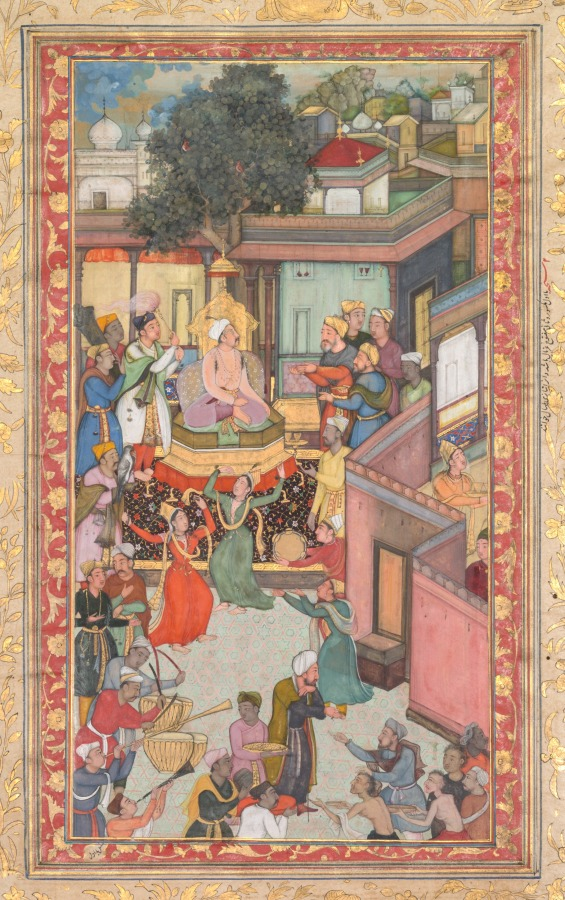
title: Circumcision ceremony for Akbar’s sons, painting 126 from an Akbar-nama (Book of Akbar) of Abu’l Fazl (Indian, 1551–1602)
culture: Mughal India, court of Akbar (reigned 1556–1605)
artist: attributed to Dharam Das (Indian, active c. 1580–1605)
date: c. 1602–3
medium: gum tempera, ink, and gold on paper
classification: Painting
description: This page is from a copy of the biography of Akbar that was completed not long before his death in 1605. It depicts him much younger, during the festivities held on October 22, 1573, in his newly built capital city of Fatehpur Sikri, near Agra, on the occasion of the circumcision ceremony for his three young sons. Dancers in Chaghatai Turkish dress perform as Akbar’s weight in gold is being distributed to the poor. Akbar wears a simple white tunic, or jama, stained at the armpits by aromatic musk. A curved dagger in a red velvet sheath is tucked into his golden sash, and he is crowned with a white crested turban.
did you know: An attendant strokes Akbar’s hunting falcon, perched on a glove.